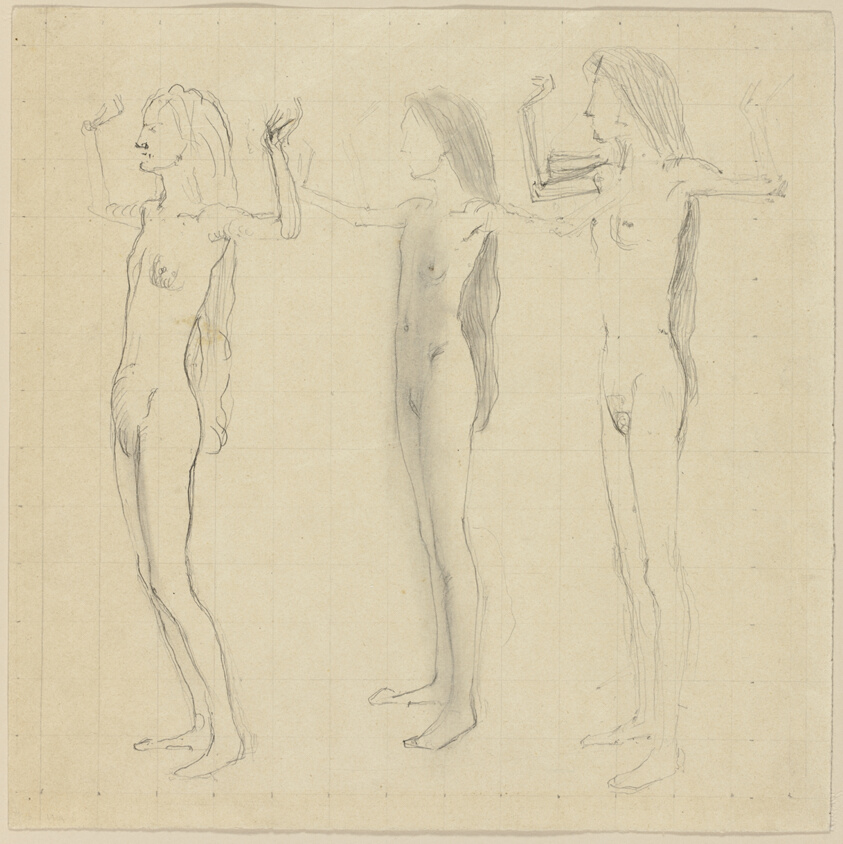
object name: Drawing and Watercolor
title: Study for Day (Truth)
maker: Ferdinand Hodler (Swiss, 1853-1918)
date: 1896/98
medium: Graphite with smudging on cream wove paper, squared for transfer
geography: Switzerland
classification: graphite; drawings (visual works); prints and drawing